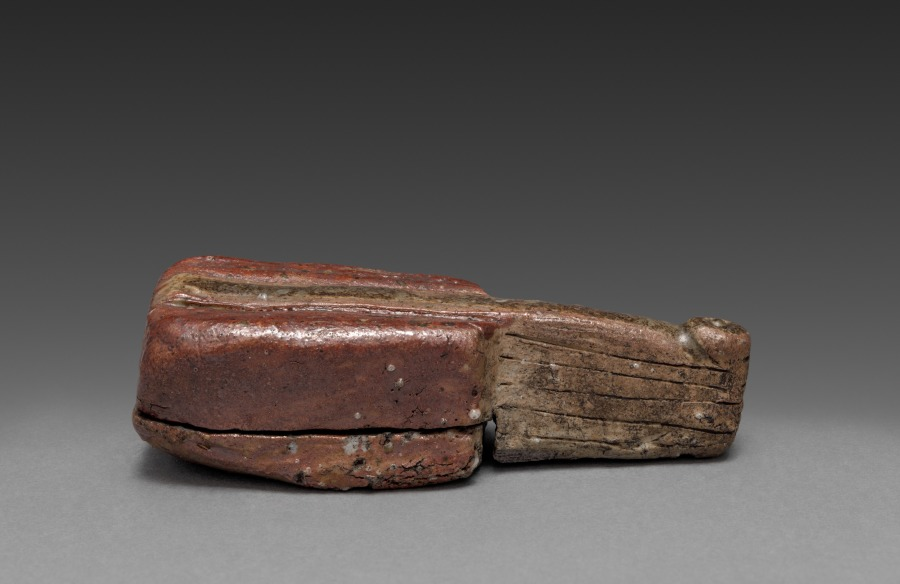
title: Ink Box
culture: Japan, Edo period (1615–1868)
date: early to mid-1800s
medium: pottery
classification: Ceramic